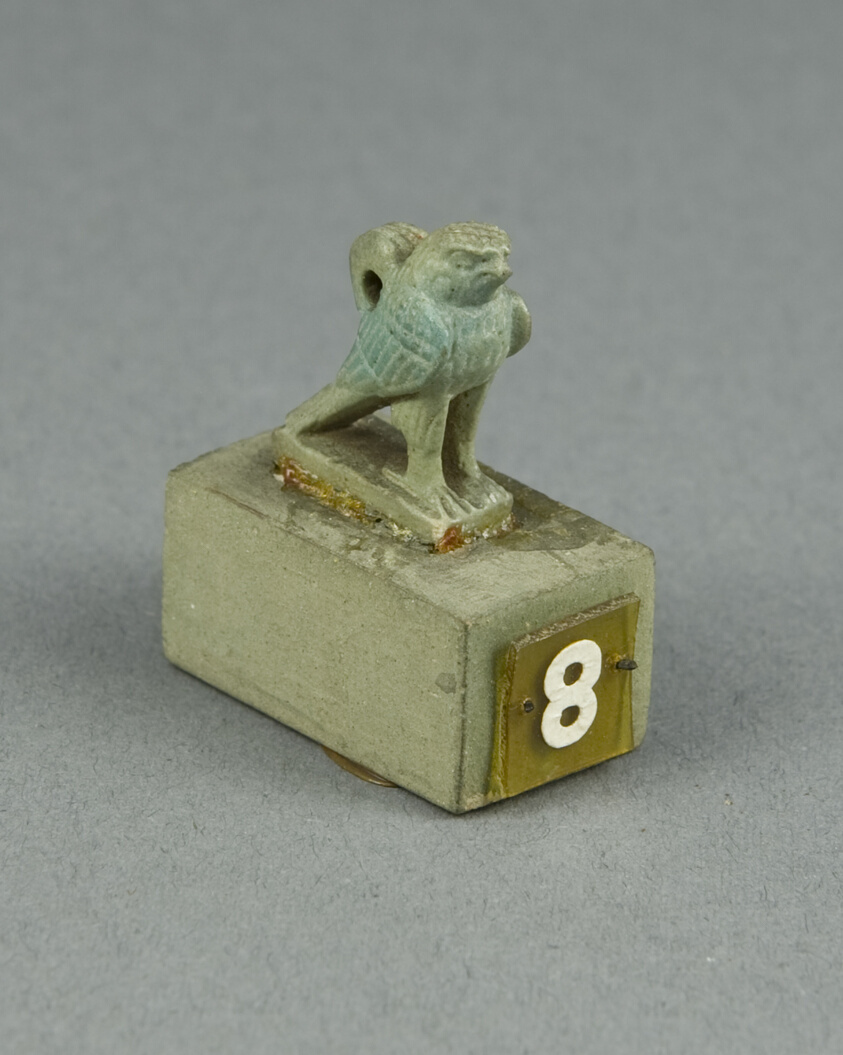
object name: Costume and Accessories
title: Amulet of a Falcon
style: egyptian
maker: Egyptian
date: Late Period, Dynasty 26–31 (664–332 BCE)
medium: Faience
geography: Egypt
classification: amulet; jewelry; ceramics; ancient art; costume; faïence (composite material)